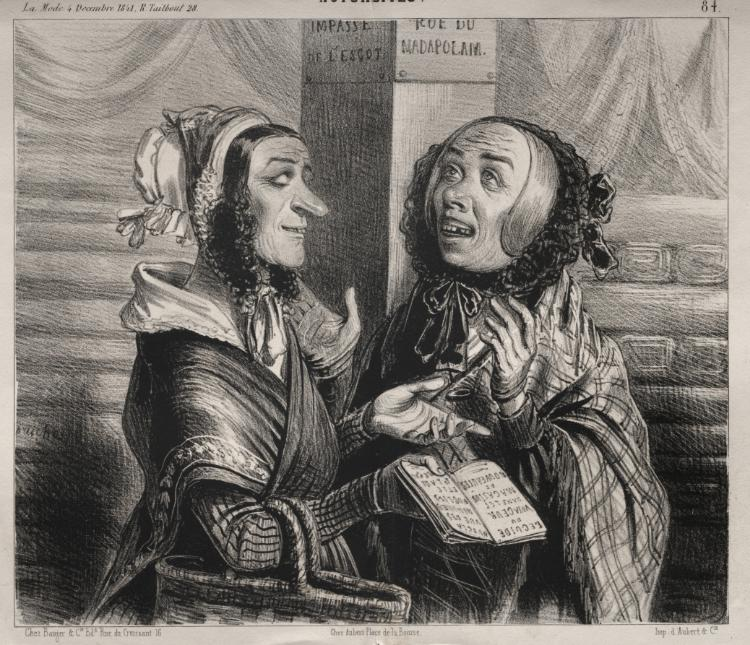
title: Actualités: Ah! M'ame Chopin!...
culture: France, 19th century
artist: Clémente Pruche (French, 1831–1870)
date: 1841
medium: lithograph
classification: Print